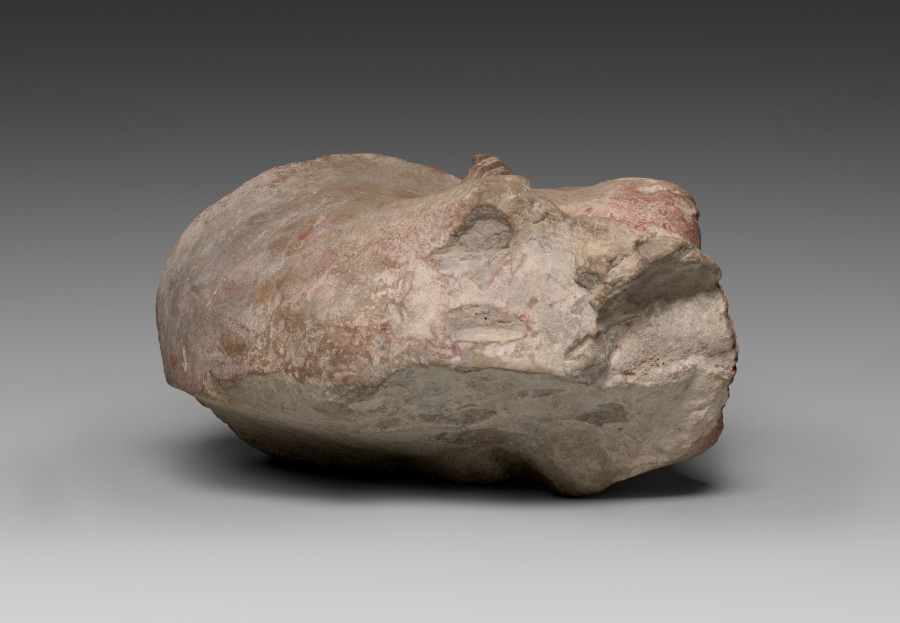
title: Fragment of a Goat's Head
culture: Greece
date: c. 500–475 BCE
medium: limestone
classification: Sculpture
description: Initially identified as a horse head, this fragmentary sculpture, once painted reddish-brown, has a beard, indicating that it depicts a goat. Its large size, however, together with its neck position and unusual round eye, have all prompted questions. Was the head broken from a rearing goat? Or did it represent Pan, the rustic shepherd god often depicted as half-man, half-goat? If Pan, some scholars have connected it with a fifth-century BC Athenian sanctuary erected to thank the god for aid in battle. An alleged provenance near the Athenian Acropolis supported this idea, but scientific tests suggest otherwise.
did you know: Pan, the goat-headed god, is often called a son of Hermes, but sources disagree.